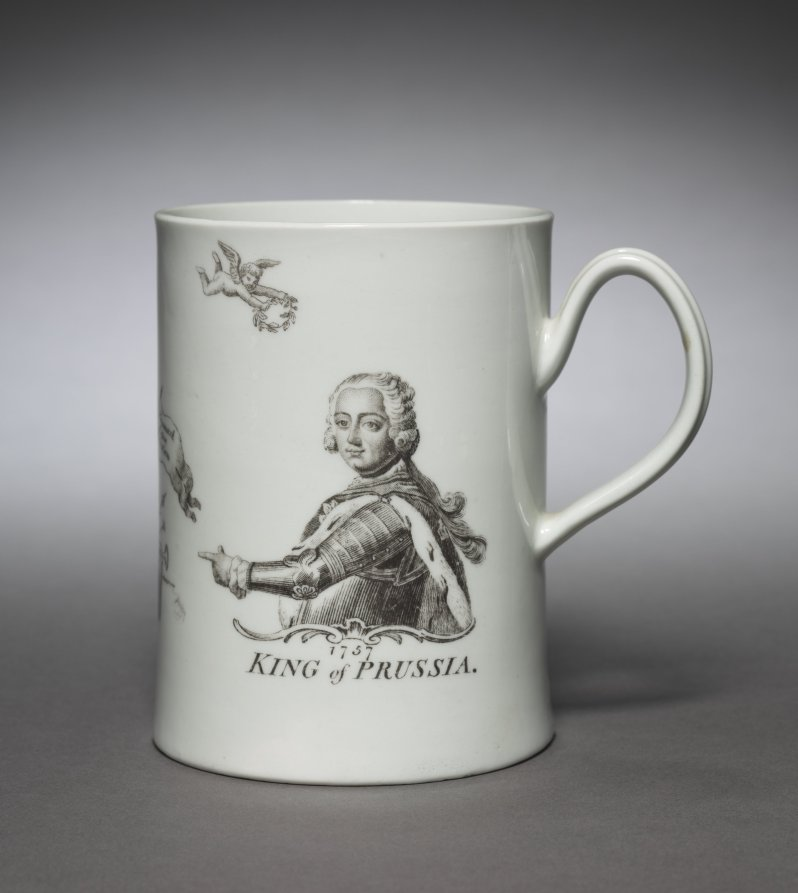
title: Cann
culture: England, 18th century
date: c. 1775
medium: ceramic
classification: Ceramic